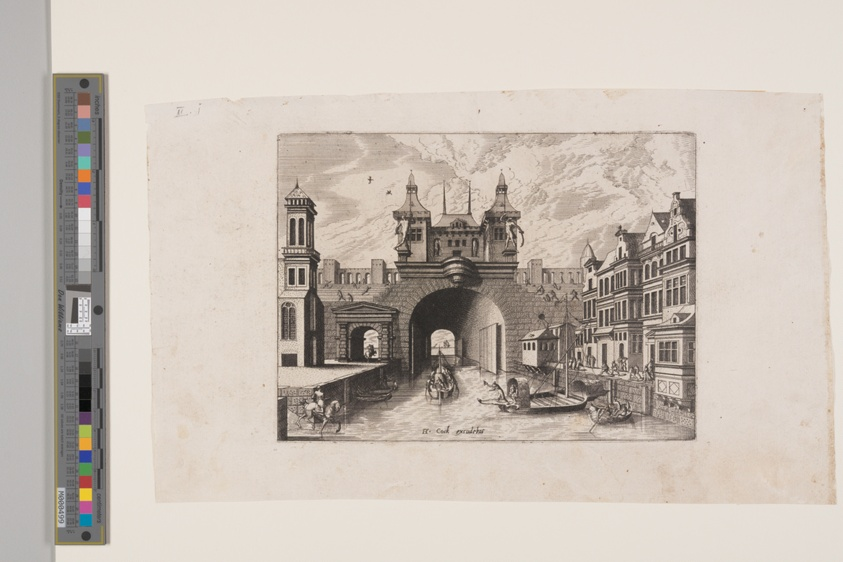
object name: Print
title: View from a canal of the gate bridge with shutters of a fortified town, street façade on the right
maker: Johannes van Doetecum (Netherlandish, 1528/32–1605) and Lucas van Doetecum (Dutch, died before 1584); after Hans Vredeman de Vries (Netherlandish, 1527-1604)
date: 1562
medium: Engraving on ivory laid paper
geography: Netherlands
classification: engraving; paper; print; prints and drawing